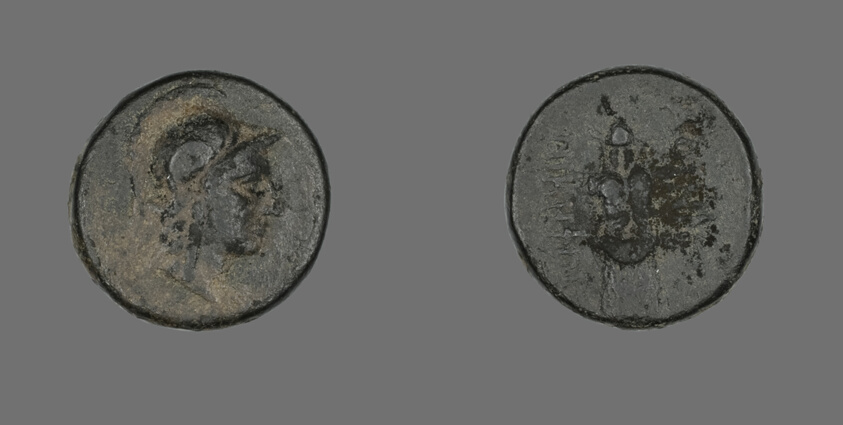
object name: Coin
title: Coin Depicting the Goddess Athena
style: greek, ancient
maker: Greek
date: about 200-133 BCE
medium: Bronze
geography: Ancient Greece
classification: coin; ancient art